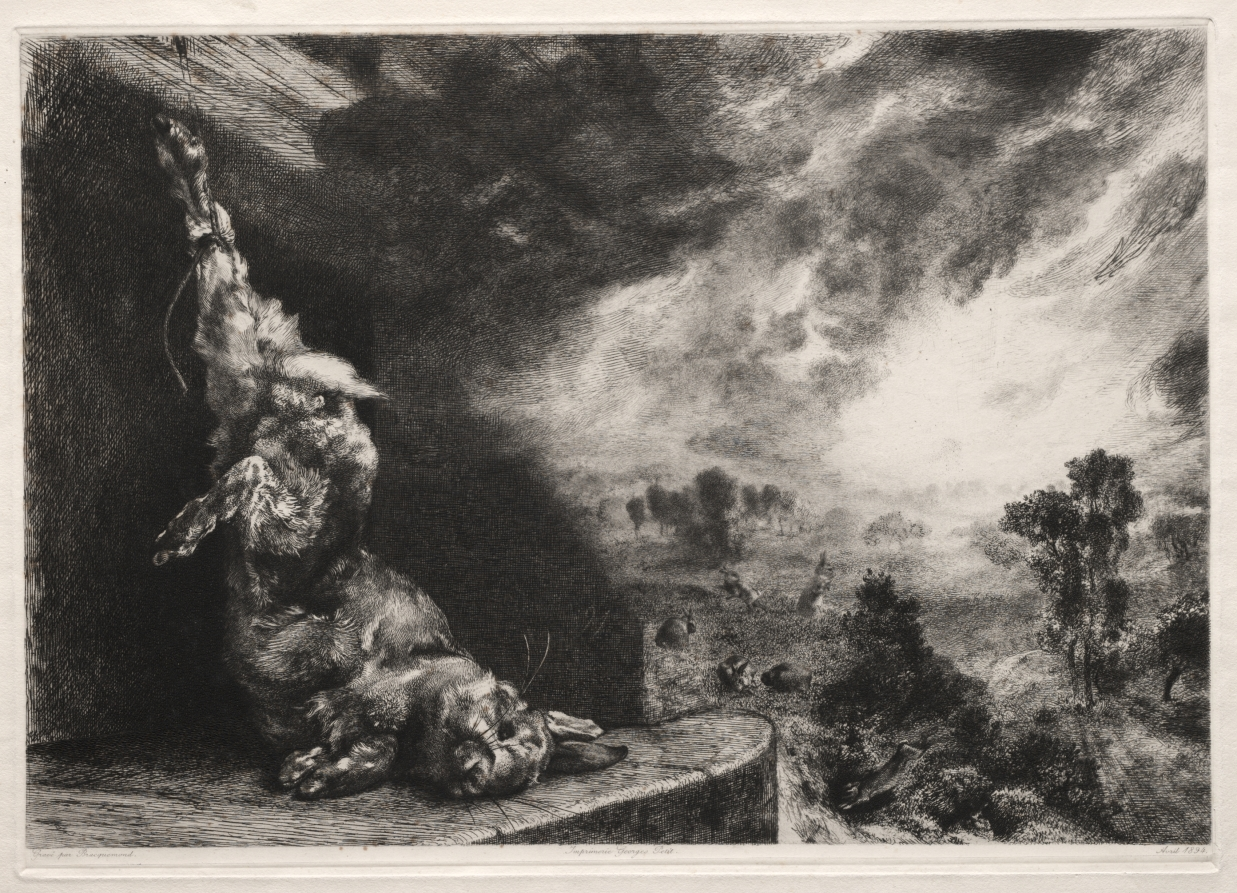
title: The Large Rabbit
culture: France, 19th century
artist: Félix Bracquemond (French, 1833–1914)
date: 1891, printed 1894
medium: etching and drypoint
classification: Print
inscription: printed: Gravé par Bracquemond / Imprimerie Georges Petit / Avril 1894